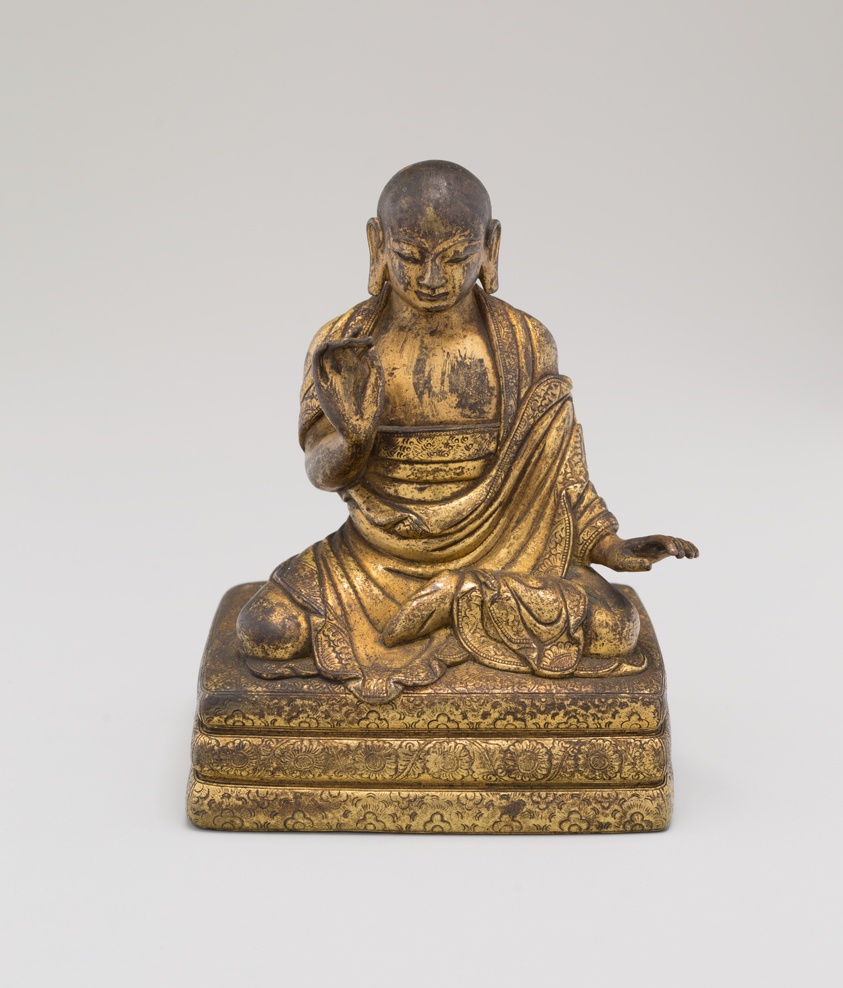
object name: Sculpture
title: One of the 18 Luohan (Arhats)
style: Chinese (culture or style)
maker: China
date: Qing dynasty (1644–1911), 18th century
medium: Brass alloy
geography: China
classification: brass; metal; sculpture; asian art